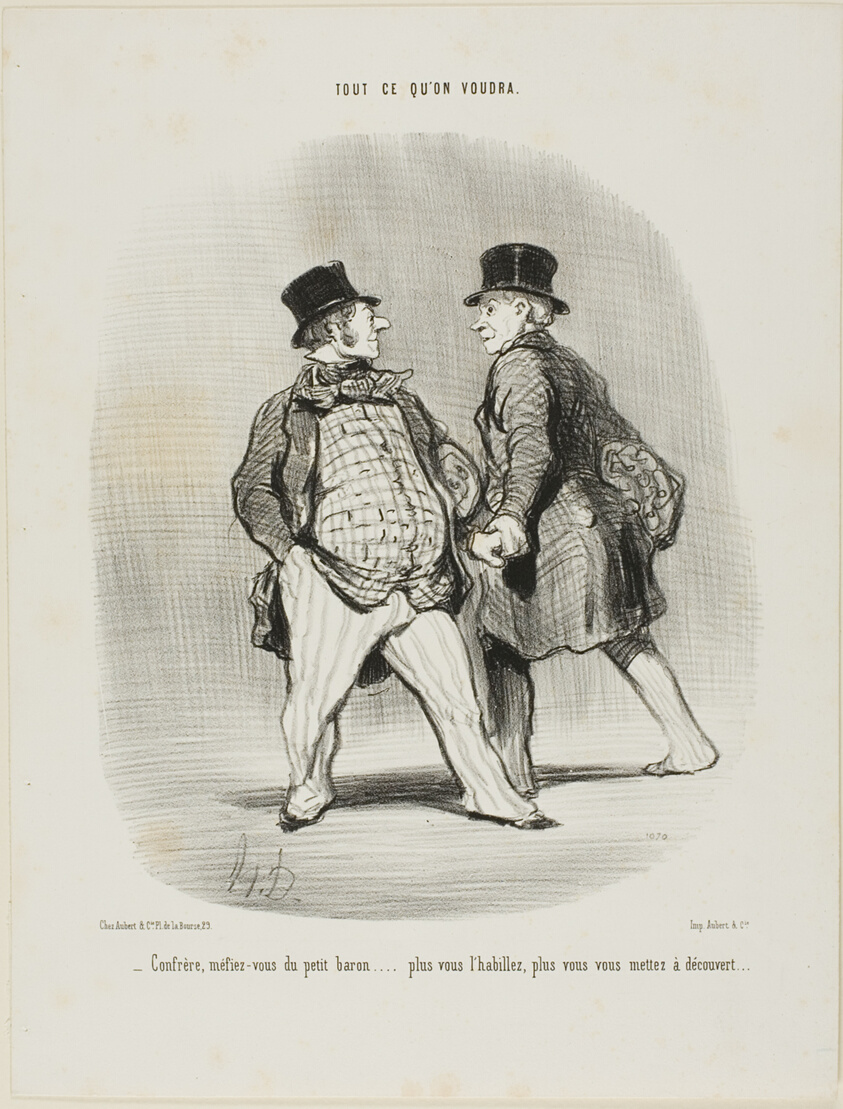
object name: Print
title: “- Beware my friend of the little baron... the more you dress him the less secured you will be,” plate 49 from Tout Ce Qu'on Voudra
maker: Honoré Victorin Daumier; French, 1808-1879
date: 1848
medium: Lithograph in black on white wove paper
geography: France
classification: lithograph; print; prints and drawing